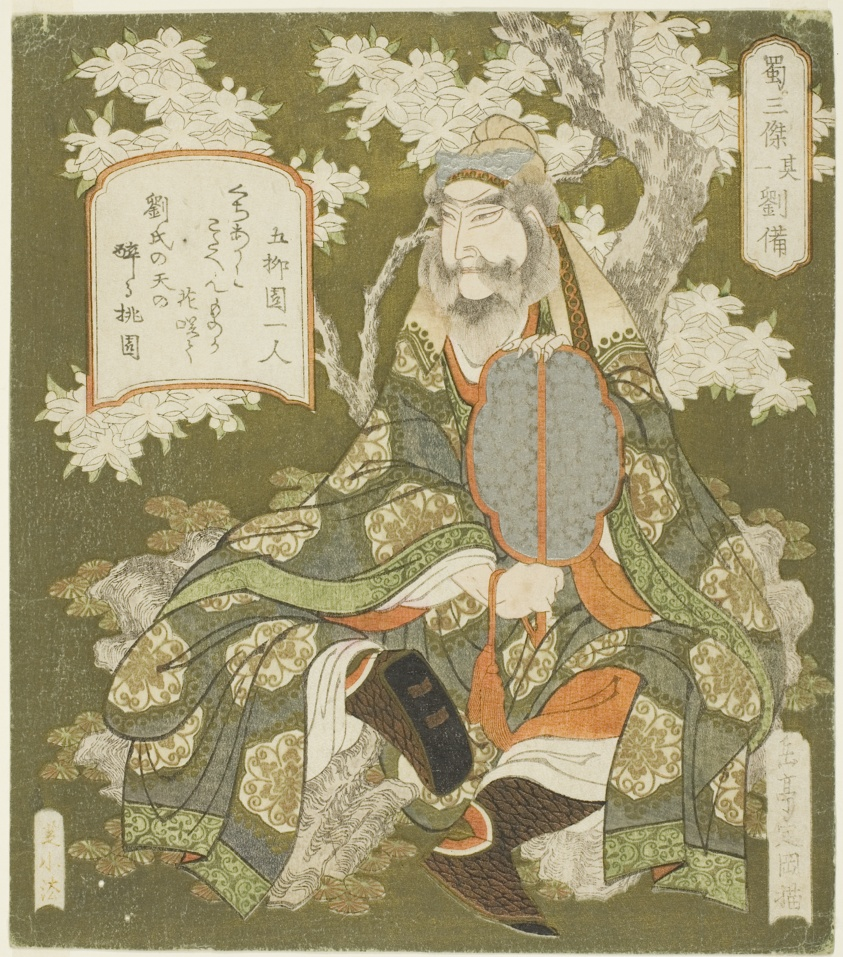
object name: Print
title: No. 1: Liu Bei (Sono ichi: Ryubi), from the series "Three Heroes of Shu (Shoku sanketsu)"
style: Japanese (culture or style)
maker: Yashima Gakutei (Japanese, 1786 (?)-1868)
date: c. 1824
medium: Color woodblock print; shikishiban, surimono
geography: Japan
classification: woodblock print; print; asian art